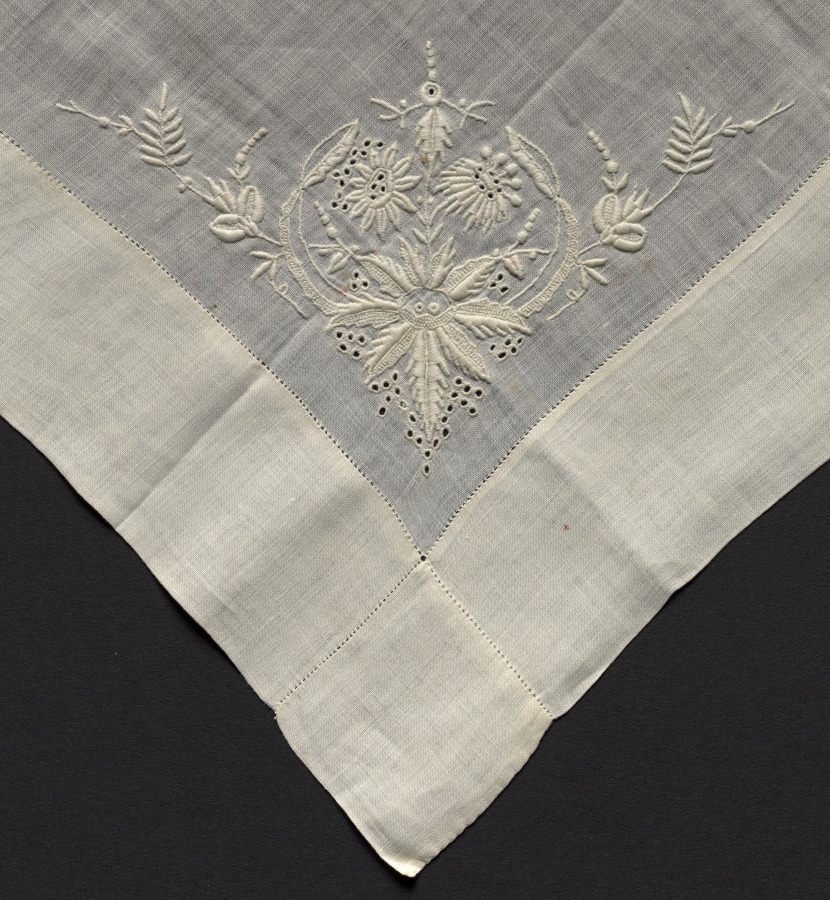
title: Handkerchief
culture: England or United States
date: 1880–99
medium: Plain weave linen, embroidered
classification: Embroidery